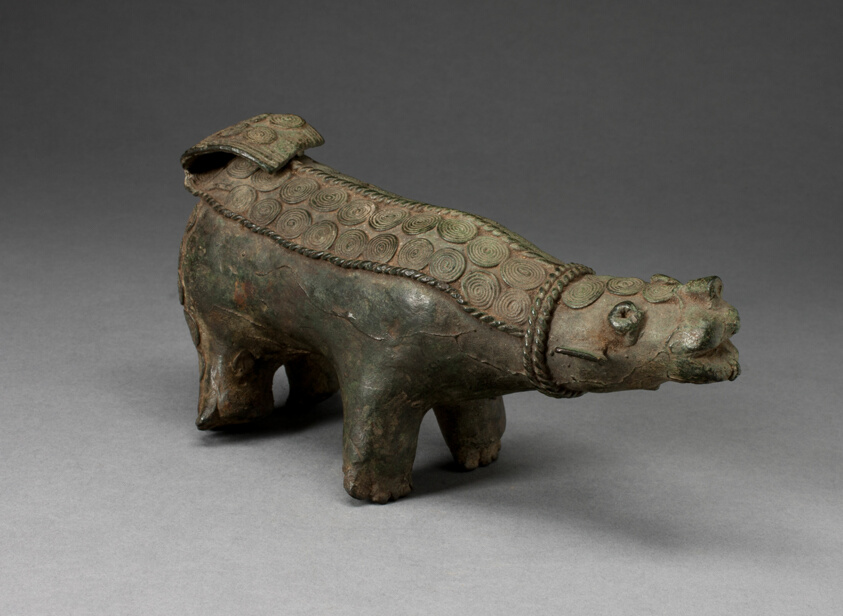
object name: Sculpture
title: Hippopotamus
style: Coastal West Africa, Arts of Africa, african Art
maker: Cross River Region; Southern Nigeria; Coastal West Africa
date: 9th/mid–19th century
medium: Bronze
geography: Nigeria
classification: metal; arts of Africa; sculpture; african art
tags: Hippopotamus